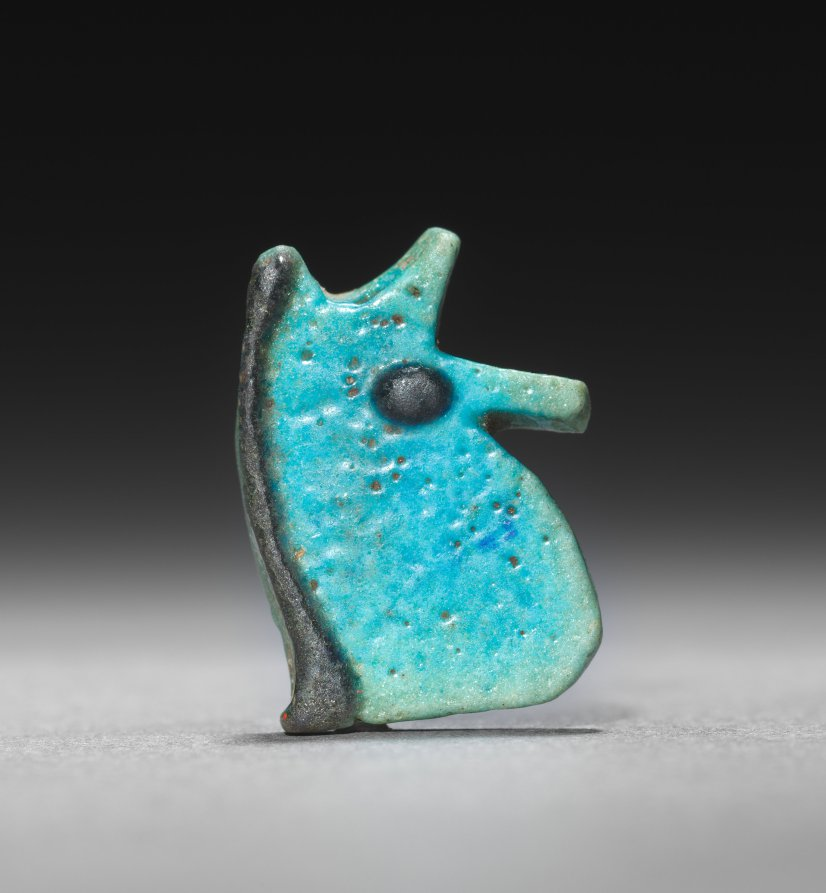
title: Eye of Horus Amulet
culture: Egypt, Third Intermediate (1069–715 BCE), Dynasties 22–25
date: 945–715 BCE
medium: turquoise faience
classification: Amulets